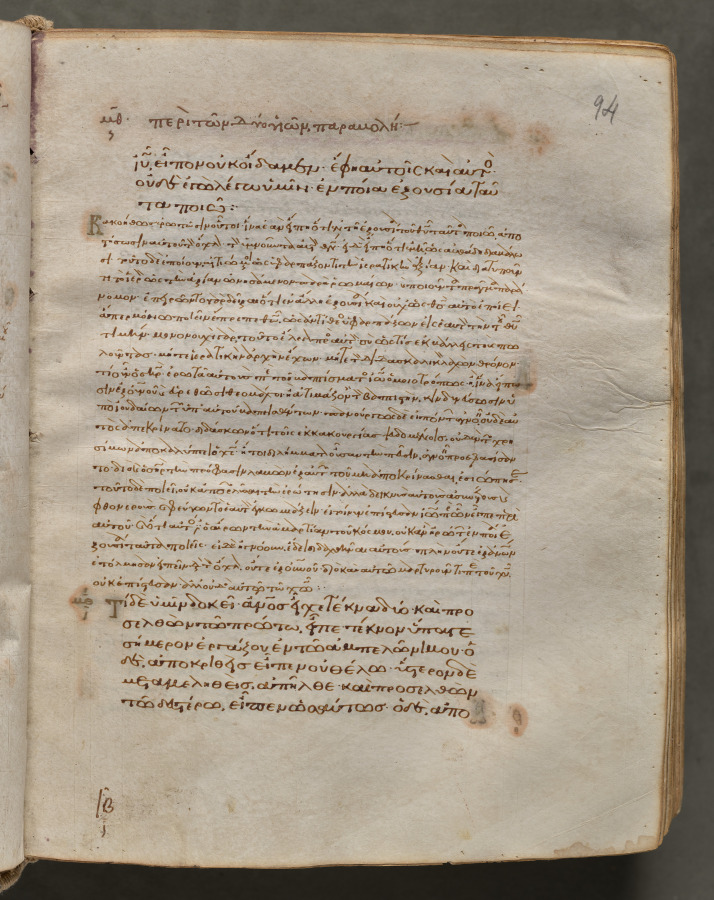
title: Text, folio 94 (recto), from a Gospel Book with Commentaries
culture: Byzantium, Constantinople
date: c. 1000–1100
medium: ink, tempera, and gold on vellum; leather binding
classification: Bound Volume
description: Each of the four gospels in this book opens on a page with brilliantly illuminated borders depicting the author of the text as well as birds-principally peacocks, symbols of the immortality of the soul-and fountains, representing the fountain of life and the salvation of the soul. This volume consists of 428 leaves with texts in Greek. Its level of sophistication suggests that it was probably written and decorated in a monastery in Constantinople.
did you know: Gospel Books were carried in procession through Byzantine churches.